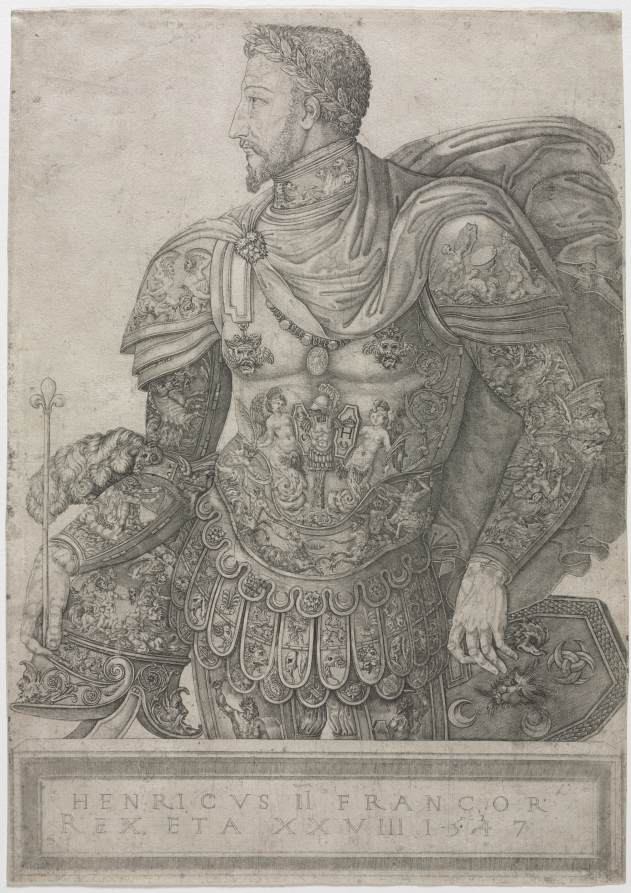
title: Henri II, King of France, at the age of 28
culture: France, 16th century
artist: Nicolo della Casa (French, active 1543–48)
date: 1547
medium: engraving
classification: Print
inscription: across bottom, in plate: HENRI C VS II FRANCOR / REX ETA XXVIII 1547 ; VERSO, across bottom, in graphite: Attribue a N. della Casa / [illegible] ; lower center, in pen and brown ink: M M S ; lower right, in graphite: c. 442 [underlined]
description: Comparing Renaissance princes with distinguished ancient leaders was a common theme in laudatory speeches, literature, and art. In commemoration of Henri II’s coronation as King of France (reigned 1547–59), Nicolo della Casa portrayed the monarch as a valiant Roman general. Crowned with a laurel wreath, the king’s head is in full profile, the traditional format used on ancient coins and engraved gems. He wears a muscled ceremonial cuirass, its breastplate heavily ornamented with war trophies, mermaids, and fighting tritons. The historicized armor, derived from antique imperial portraits and figures of the war-god Mars, creates a powerful and timeless image of the French sovereign.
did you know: Henry II loved finely embossed parade armor. He died at the age of 41 after having his eye put out during a tournament.